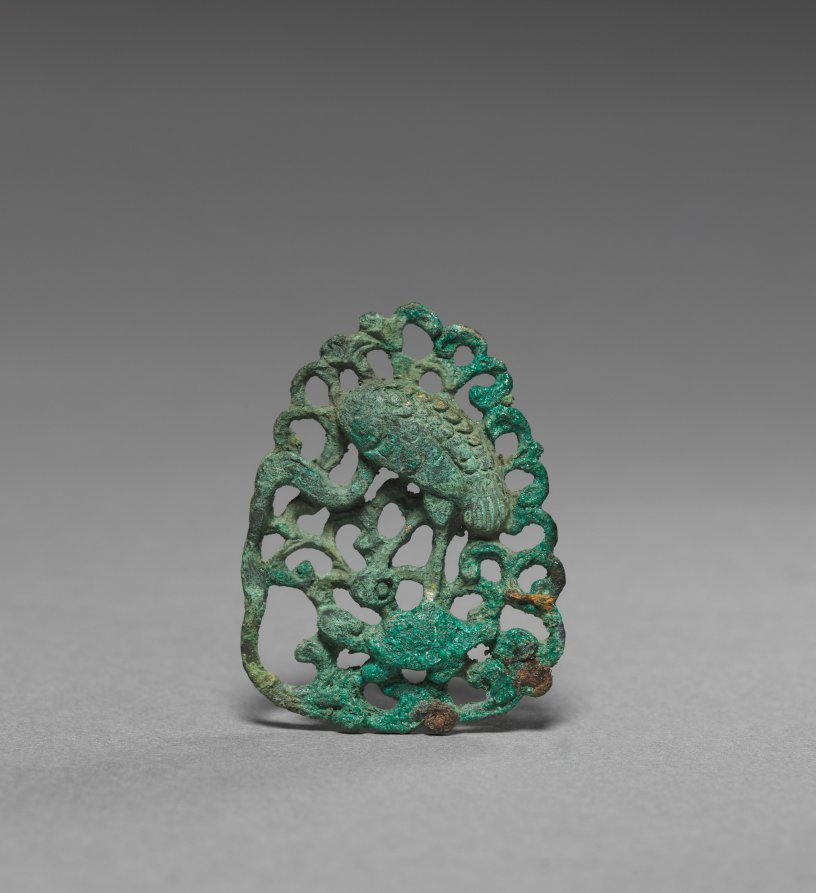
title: Ornament with Heron and Turtle Design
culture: Korea, Goryeo dynasty (918–1392)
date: 1100s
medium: bronze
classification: Metalwork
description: Metalworking techniques advanced remarkably during the Goryeo period (918–1392). Sophisticated metal objects with intricate designs were used not only as daily accessories, but also as burial goods for commemorating the dead. Traces of fibers found on the backs of these metal ornaments suggest that they were once used as brooches to hold garments together.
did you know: This metal ornament is part of a decorative brooch once used to hold clothes together.